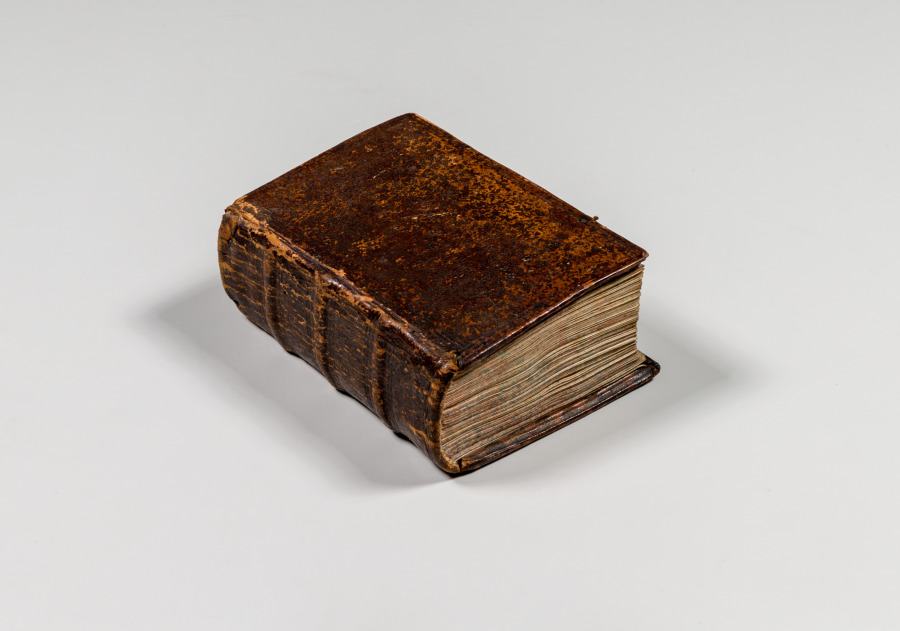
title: Book of Hours (Use of Metz)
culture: France, Metz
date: c. 1440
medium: ink, tempera, and gold on vellum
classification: Bound Volume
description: The first seven folios of this book list dedications for Metz churches and indulgences, or ways to receive forgiveness for sins, that are unique to that diocese, or area of jurisdiction of a bishop. The city of Metz, situated on the Moselle River, was the cultural and commercial capital of Lorraine during the 1400s. It was also the location of an important bishopric and therefore the center of a growing book trade.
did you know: It is believed that medieval men and women read their books of hours aloud, not silently.